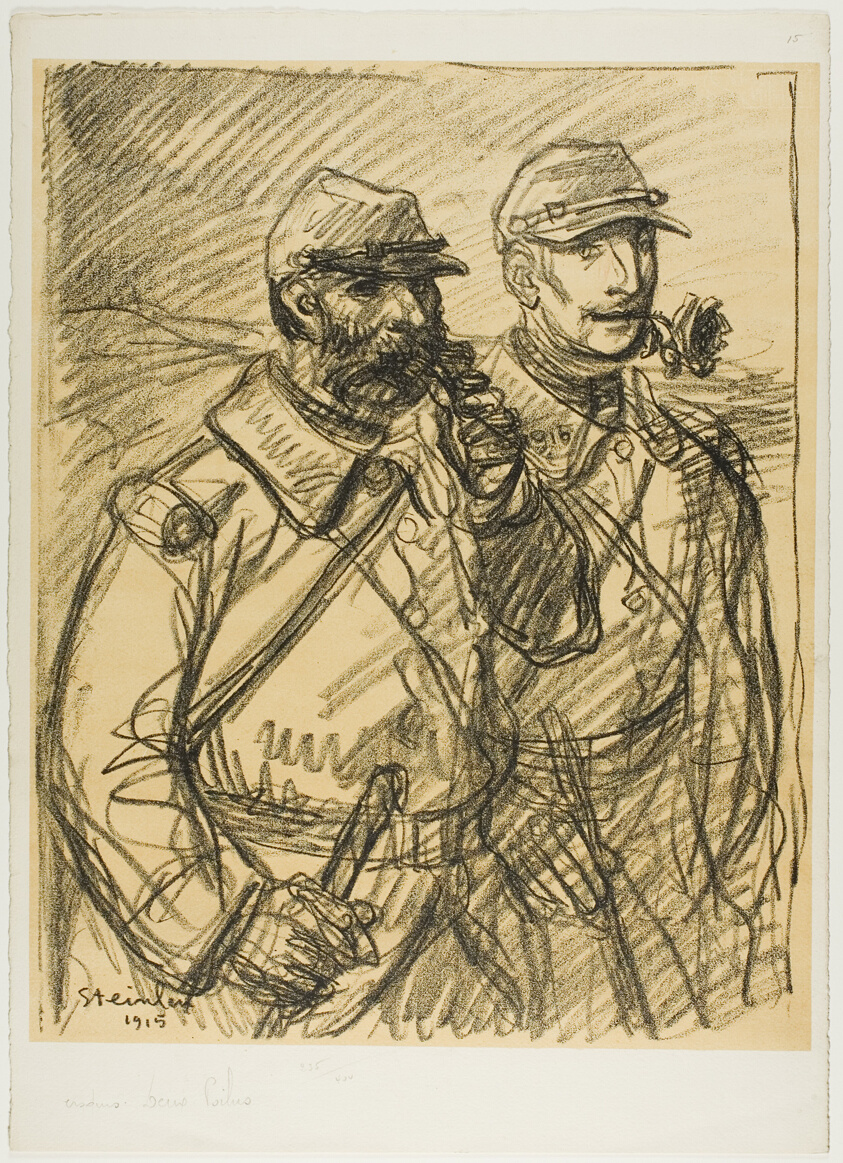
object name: Print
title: Two Soldiers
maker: Théophile-Alexandre Steinlen; French, born Switzerland, 1859-1923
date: 1915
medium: Lithograph in black over fawn tint on thick off-white wove paper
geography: France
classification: lithograph; print; prints and drawing